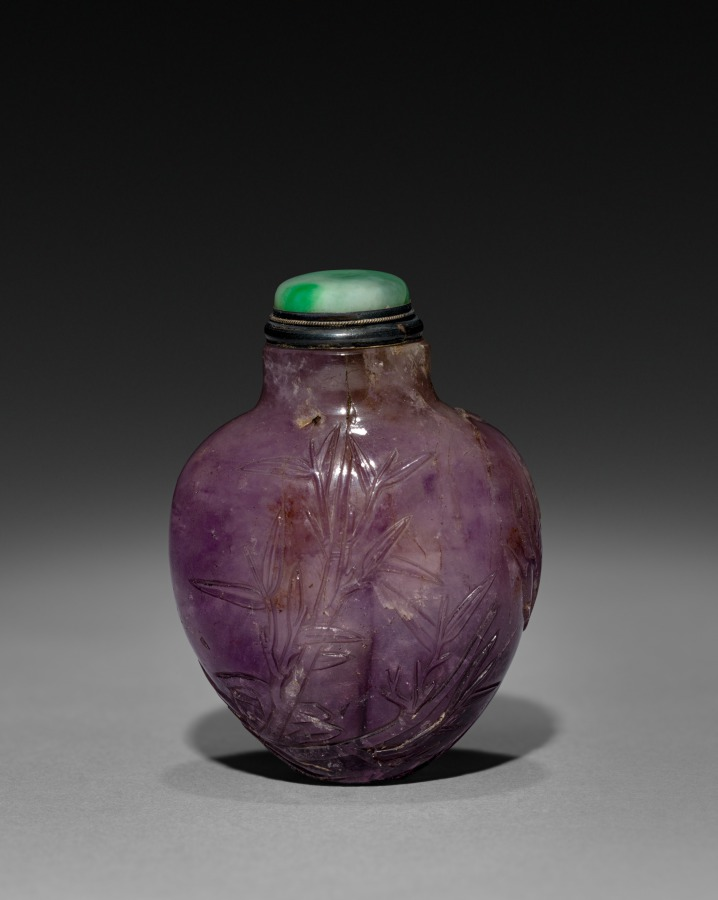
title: Snuff Bottle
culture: China, Qing dynasty (1644-1911)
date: 1644–1911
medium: glass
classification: Glass